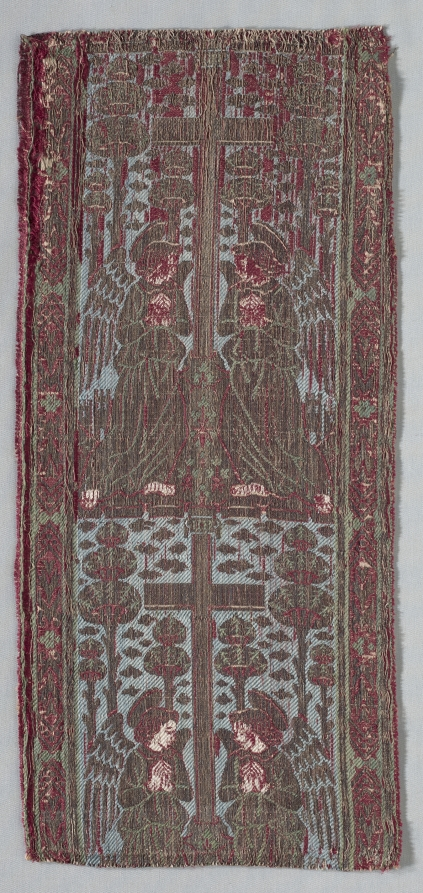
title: Orphrey Band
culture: Italy, 15th century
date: 1400s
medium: lampas weave, silk and metal; compound twill in narrow bands across top and bottom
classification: Textile